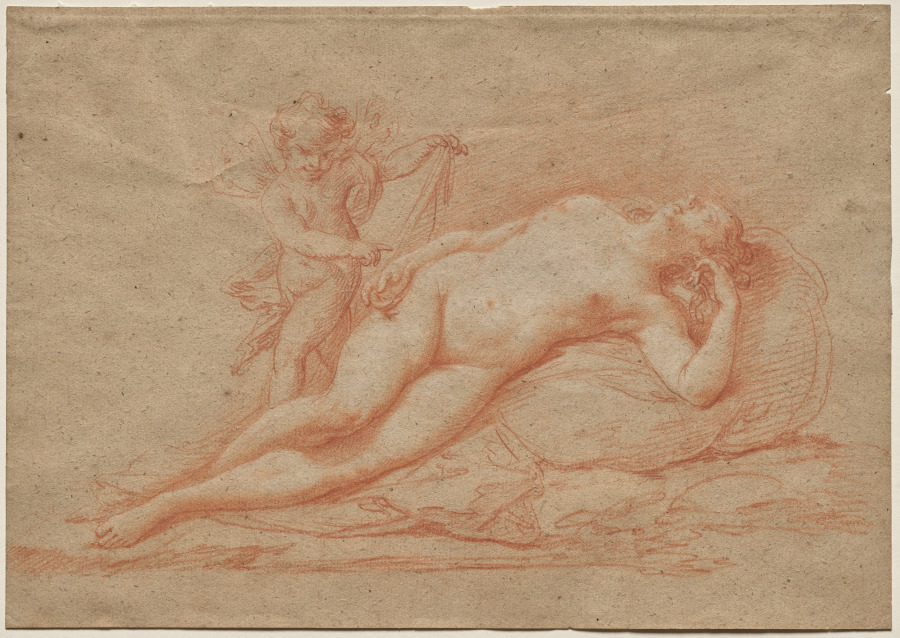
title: Reclining Nude with Cupid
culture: Italy, 18th century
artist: Giovanni Battista Cipriani (Italian, 1727–1785)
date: 1700s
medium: red chalk heightened with white chalk on brown handmade antique laid paper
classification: Drawing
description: Giovanni Battista Cipriani spent much of his career in England, where he was a founding member of the Royal Academy. There, he taught life classes and focused on the study of the human form in his own work, such as this sheet. In addition to anatomical study, Cipriani often added fantastical flourishes to his studies, such as the cherub seen here.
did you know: A series of Giovani Battista Cipriani’s drawings were published after his death as an instructional text for students of the medium.